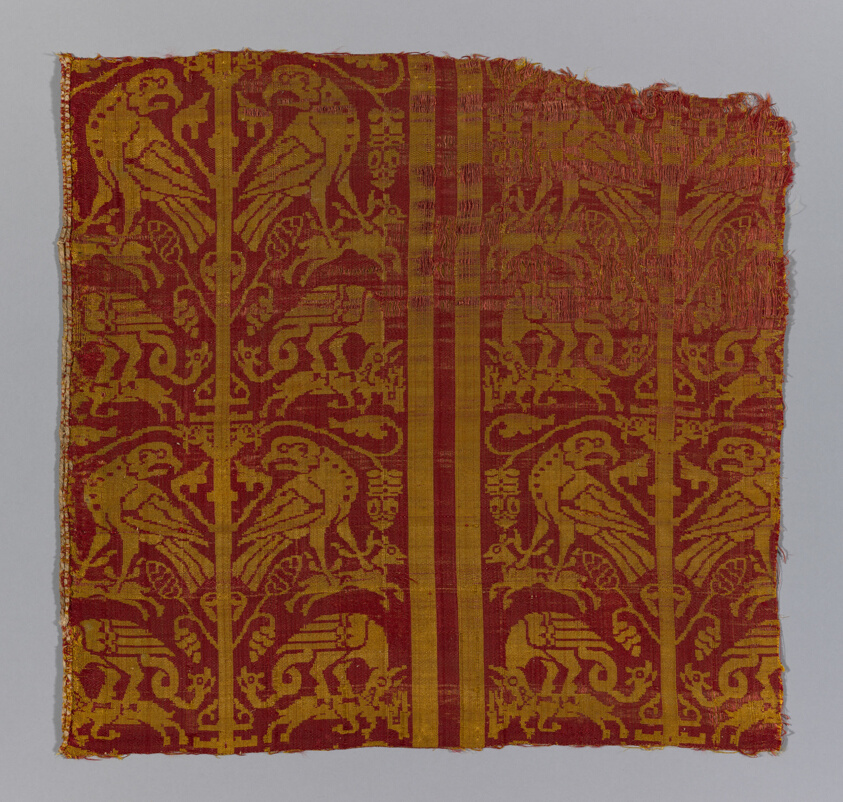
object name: Textile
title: Panel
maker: Spain (Possibly Italy)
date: 13th/14th century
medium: Silk and linen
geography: Spain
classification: textile; weaving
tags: tree of life, dragons, eagles, hares, goats, mythology